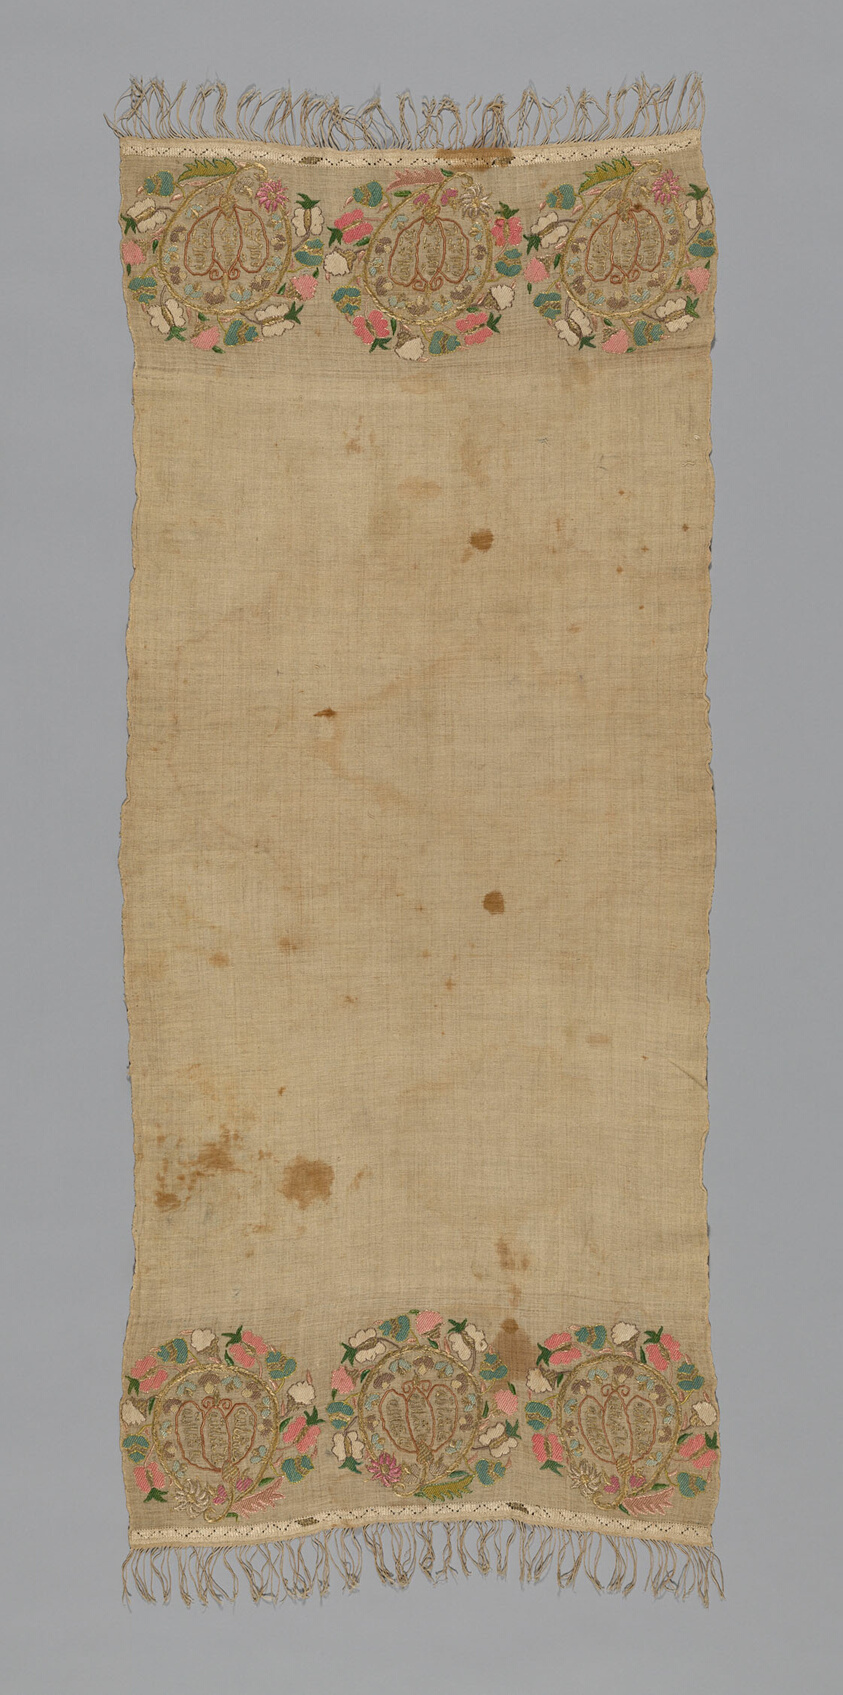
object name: Textile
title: Towel or Napkin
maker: Turkey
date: 19th century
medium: embroidery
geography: Turkey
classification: textile; needlework (visual works); weaving